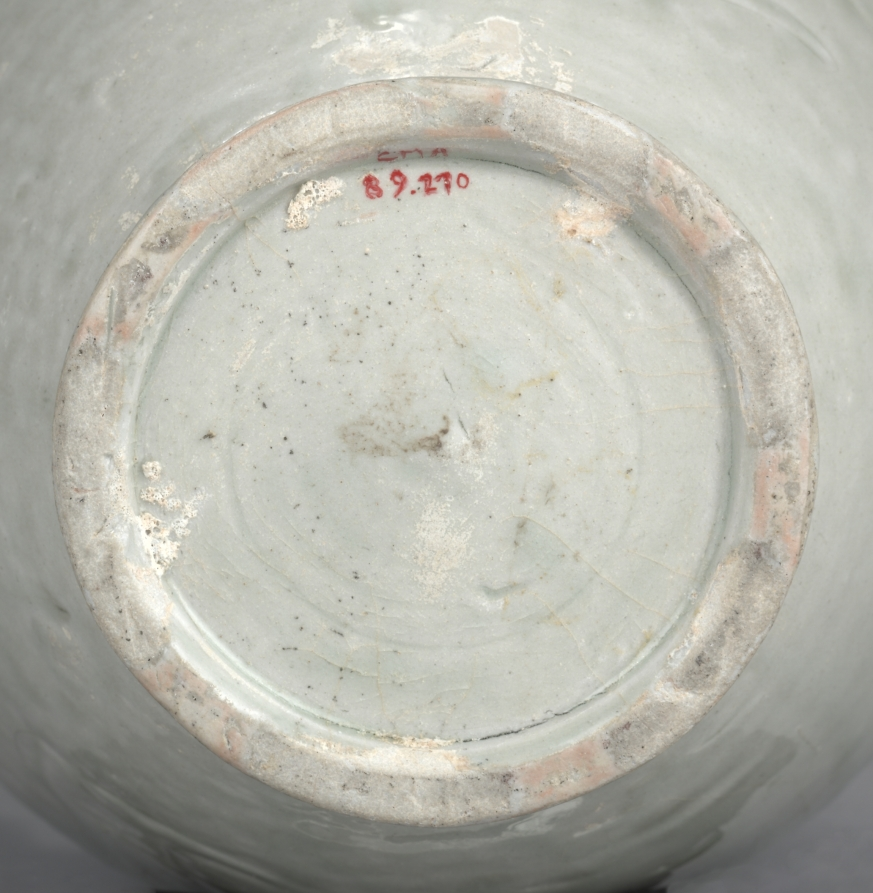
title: Vase with Peonies and Five Spouts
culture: China, Zhejiang province, Hangzhou, Southern Song dynasty (1127-1279)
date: 900s–1000s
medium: green-glazed porcelaneous stoneware with incised decoration, Yue ware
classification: Ceramic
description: "In full autumn wind and dew the kilns of Yue open; And a thousand peaks are despoiled of their halcyon green" (translated by S. W. Bushell). These 9th-century poetic lines glorify the highly prized green-glazed Yue wares of the Tang period. This later example has a pale green glaze that is glassy and consistent, which indicates a precise control of the glaze components as well the kiln atmosphere by reducing the amount of oxygen at some stage during the firing.